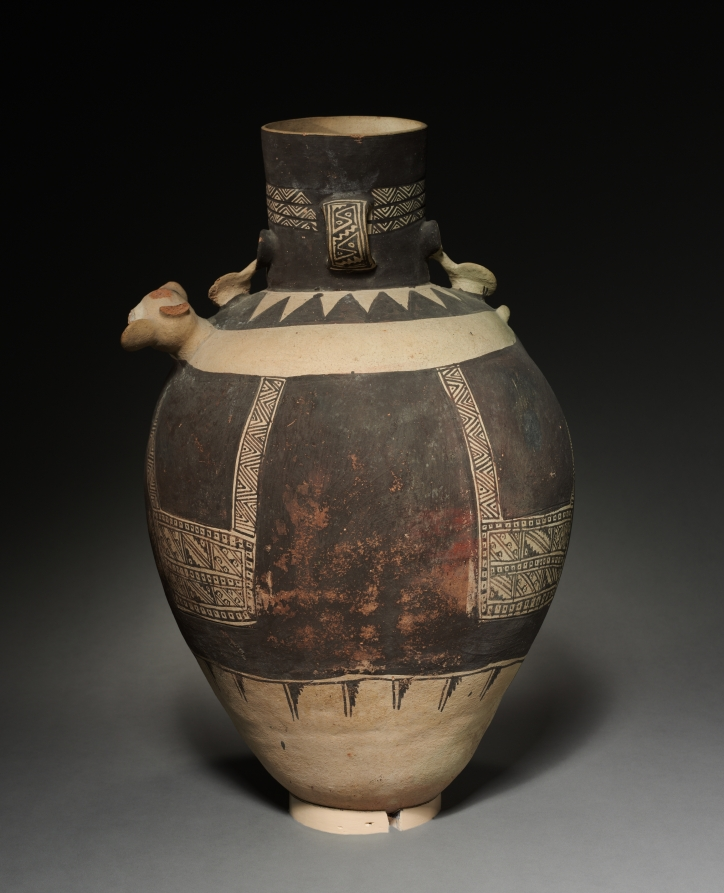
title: Vessel in the Shape of a Figure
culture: Peru, Central Coast, Chancay sytle, 12th-15th century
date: 1000–1460s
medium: earthenware with painted slip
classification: Ceramic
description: This seated figure carries a stag over his shoulders, its antlers now missing and its tongue lolling out in death. That the stag is destined for more than dinner is suggested by the human's pursed lips--perhaps the kiss-like expression of reverence that the later Inka made when approaching a sacred shrine. The animal, then, may be an offering. The two bags painted on the figure's back may be for coca leaves, also very important for rituals. In comparison to earlier ceramics, the Chancay style seems less fine both artistically and technically. yet as this vessel proves, the best Chancay ceramics have appealing charm, in part because of their bold brown-on-white color scheme.